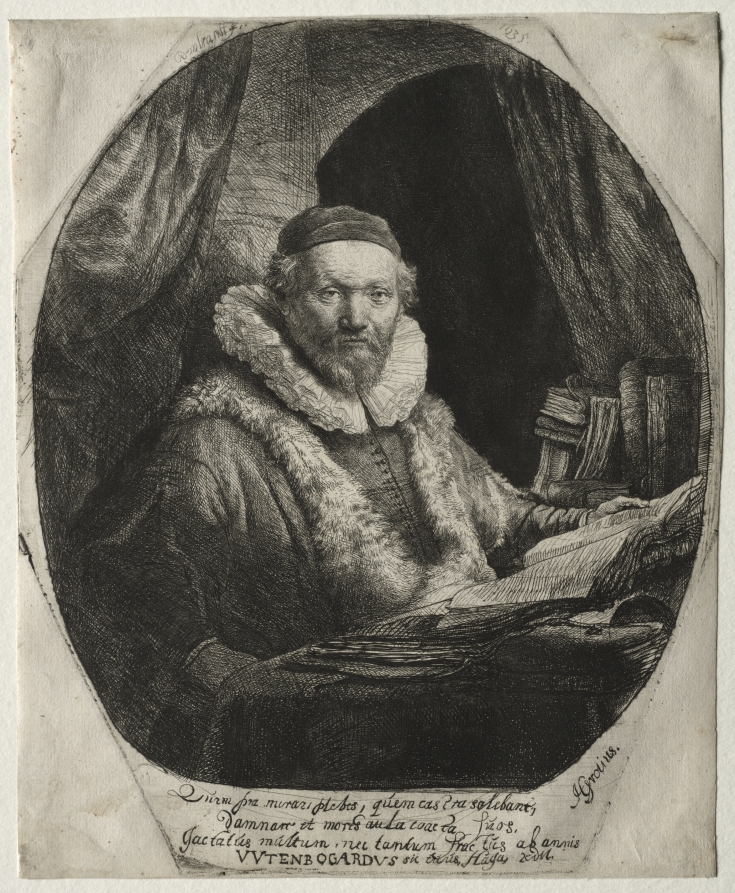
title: Jan Uytenbogaert, Preacher of the Remonstrants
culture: Netherlands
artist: Rembrandt van Rijn (Dutch, 1606–1669)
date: 1635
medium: etching and drypoint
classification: Print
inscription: upper left, in plate: Rembrandt f. ; upper right, in plate: 1635 ; across bottom (four lines of verse), in plate: Quem pia mirari plebes, quem castra solebant, / damnare et mores aula coacta suos. / Iactatus multum, nec tantum fractus ab annis / VVTENBOGARDVS sic tuus, Haga, redit. / H. Grotius. ; VERSO, upper center, in graphite: [x41?][sideways] ; lower left, in graphite: B. 279. Bl. 190. Rov. V ; lower left, in graphite: AAS[L...?] ; lower left, in graphite: a71050 ; lower center, in graphite: L[backwards]/I/V ; lower right, in graphite: S[circled]F